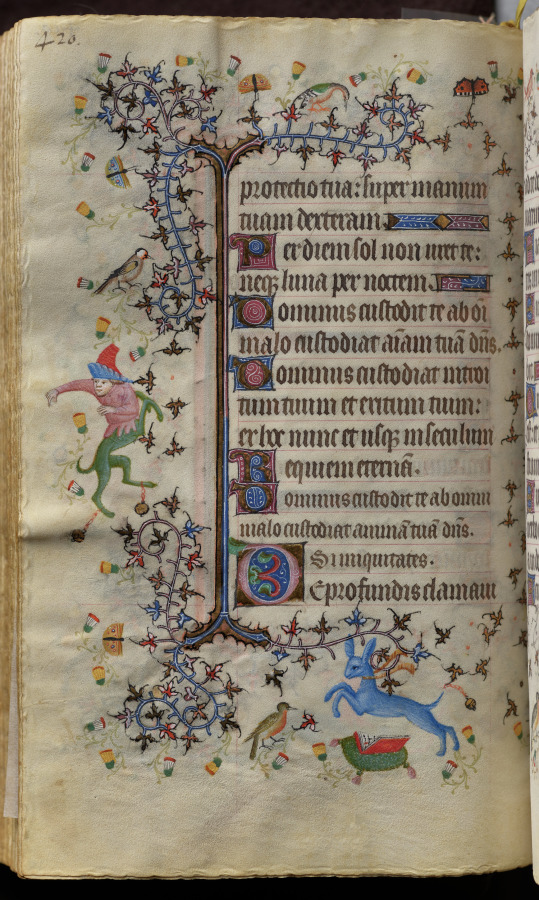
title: Hours of Charles the Noble, King of Navarre (1361-1425): fol. 204v, Text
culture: France, Paris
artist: Master of the Brussels Initials and Associates (French)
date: c. 1405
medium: ink, tempera, and gold on vellum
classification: Bound Volume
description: This precious volume was obviously highly prized by its owner, the French-born King of Navarre, who had his coat of arms painted on no less than twenty folios. Rather than directly commissioning this manuscript from a specific workshop, it seems that Charles the Noble acquired his book of hours -- perhaps ready-made for the luxury market -- while on a trip to Paris in 1404-05. A collaborative effort, six painting styles are evidenced within the pages of this codex, those of two Italians, two Frenchmen, and two Netherlanders. The painter who was responsible for the planning and decoration of the book, and who produced seventeen of the large miniatures, was a Bolognese artist known as the Master of the Brussels Initials. His principal assistant, responsible for most of the borders, was a Florentine who signed his name "Zecho" da Firenze on folio 208 verso.